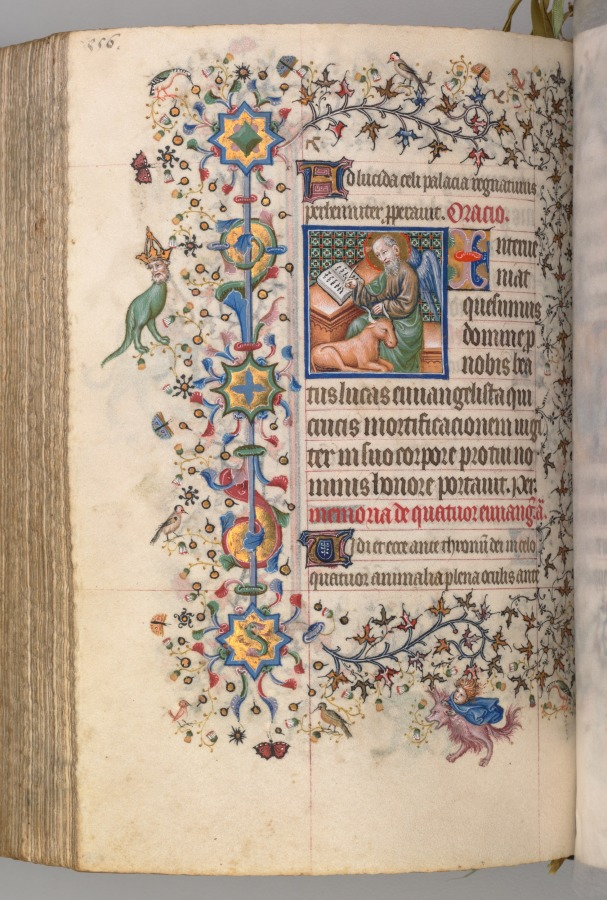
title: Hours of Charles the Noble, King of Navarre (1361-1425): fol. 272v, St. Luke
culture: France, Paris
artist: Master of the Brussels Initials and Associates (French)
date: c. 1405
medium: ink, tempera, and gold on vellum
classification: Bound Volume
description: This precious volume was obviously highly prized by its owner, the French-born King of Navarre, who had his coat of arms painted on no less than twenty folios. Rather than directly commissioning this manuscript from a specific workshop, it seems that Charles the Noble acquired his book of hours -- perhaps ready-made for the luxury market -- while on a trip to Paris in 1404-05. A collaborative effort, six painting styles are evidenced within the pages of this codex, those of two Italians, two Frenchmen, and two Netherlanders. The painter who was responsible for the planning and decoration of the book, and who produced seventeen of the large miniatures, was a Bolognese artist known as the Master of the Brussels Initials. His principal assistant, responsible for most of the borders, was a Florentine who signed his name "Zecho" da Firenze on folio 208 verso.